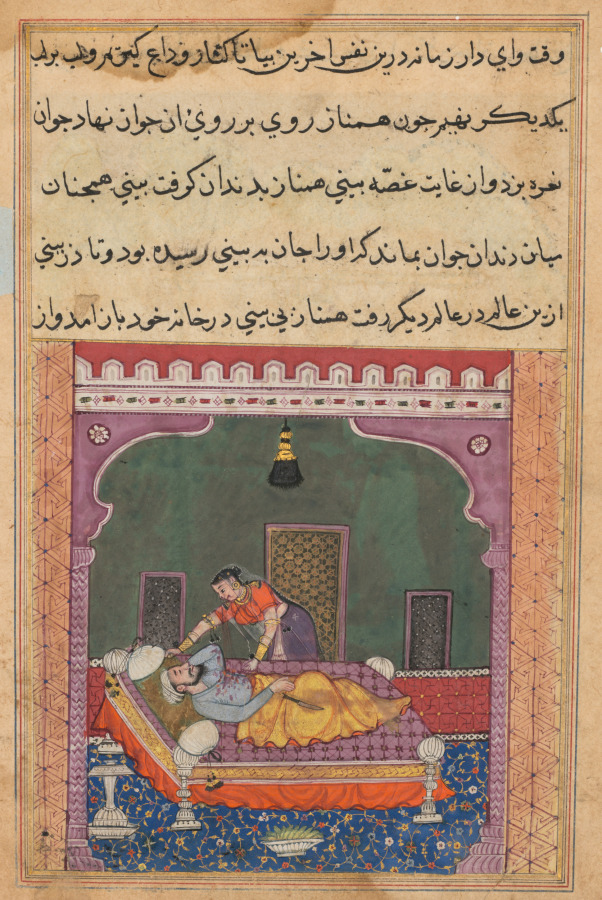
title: In order to falsely implicate her husband, Hamnaz places a knife by his side and lets the blood dripping from her nose stain his clothes, from a Tuti-nama (Tales of a Parrot): Twenty-fifth Night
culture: Mughal India, court of Akbar (reigned 1556–1605)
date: c. 1560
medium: gum tempera, ink, and gold on paper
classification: Painting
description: Hamnaz, whose nose was bitten off by her dying lover, leans over her sleeping husband. She intends to frame him for causing the injury so that her affair will not be revealed. When Hamnaz’s nose is found in the mouth of the dead lover, her husband is absolved.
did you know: A burglar who had broken into Hamnaz’s home is the first to reveal her secret affair.